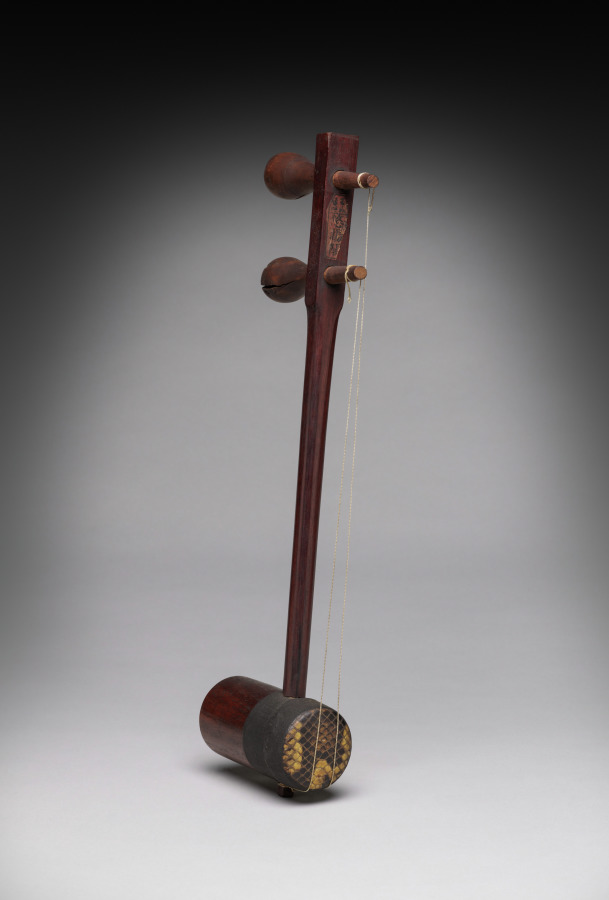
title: Erxian (Two-Stringed Chinese Fiddle)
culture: China, Qing dynasty (1644-1911)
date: 1800s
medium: wood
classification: Musical Instrument